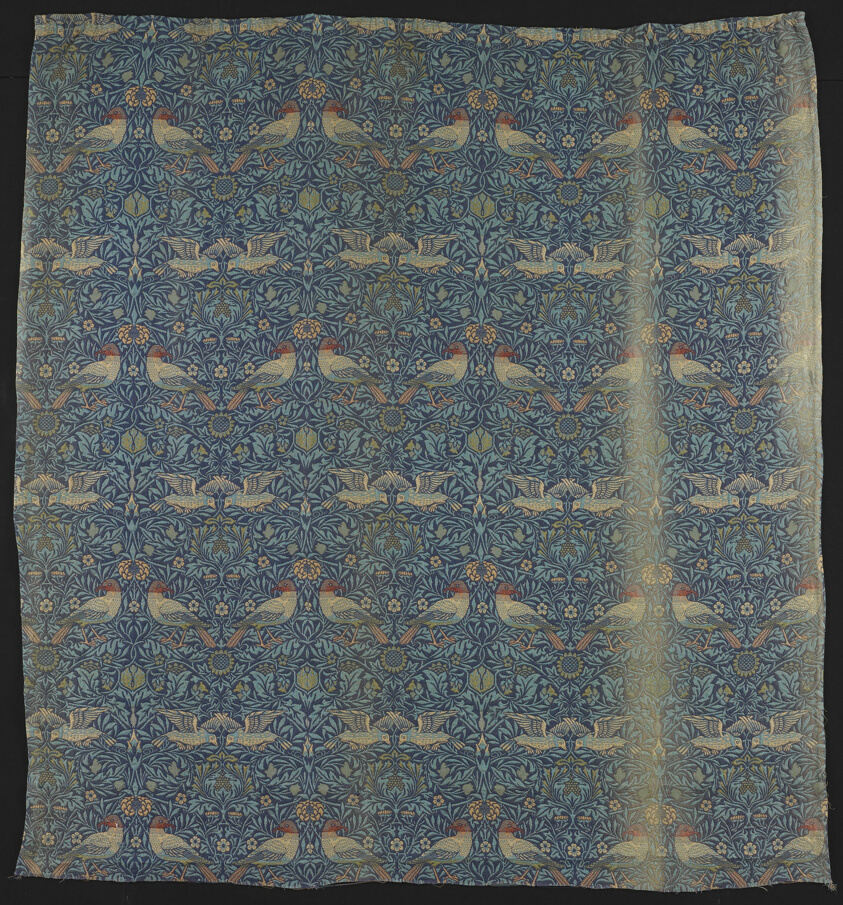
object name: Textile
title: Bird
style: Arts and Crafts Movement, british, 19th century, 20th Century, British Arts and Crafts Movement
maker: Designed by William Morris (English, 1834–1896); Produced by Morris & Co., London (English, 1875–1940); Queen Square, London (English 1865-81) or Merton Abbey, London (English, 1881-1940)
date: Design 1878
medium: Wool, plain weave double cloth of three complementary sets of warps and wefts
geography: England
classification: textile; weaving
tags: birds, animals, floral, foliage, botanical